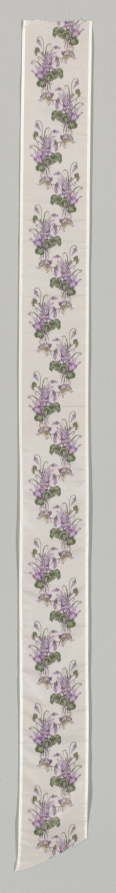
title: Ribbon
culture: France, 19th century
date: 1800s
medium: silk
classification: Textile